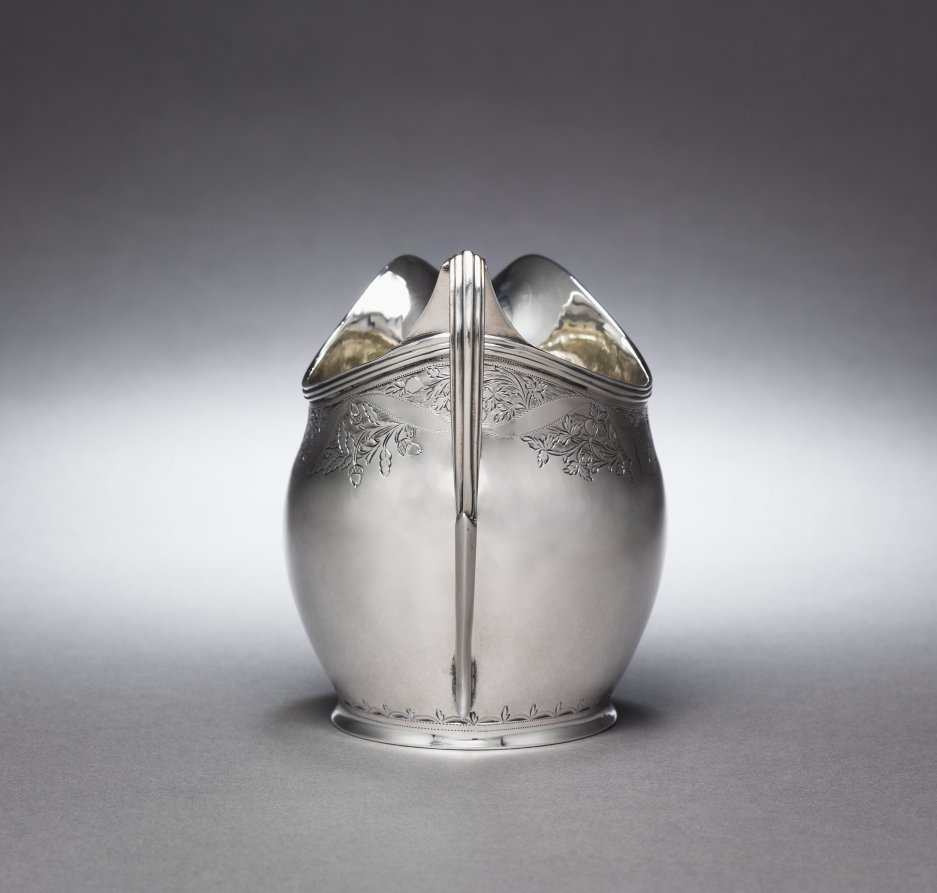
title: Tea Service (Creamer)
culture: London, England, 19th century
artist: Anne Bateman (British, 1748–1813)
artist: Peter Bateman (British, 1740–1825)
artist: William (I) Bateman (British, 1774–1850)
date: 1807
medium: silver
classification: Silver